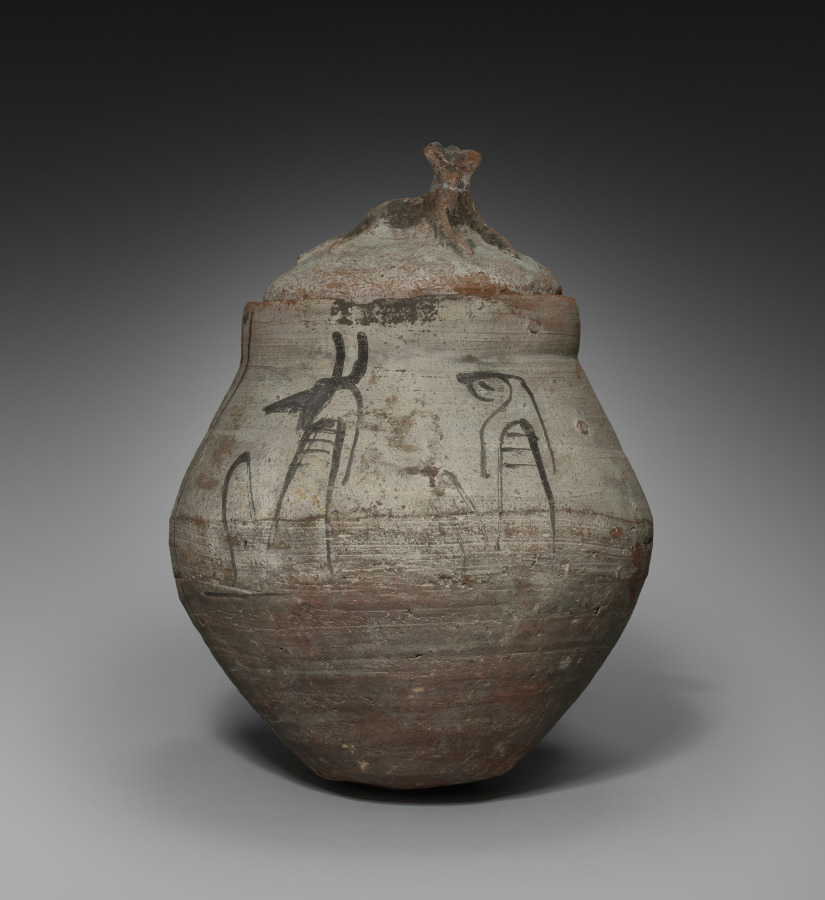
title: Shawabty Jar with Lid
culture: Egypt, New Kingdom (1540–1069 BCE), Dynasties 19–20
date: 1295–1069 BCE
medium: Nile silt ware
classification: Funerary Equipment